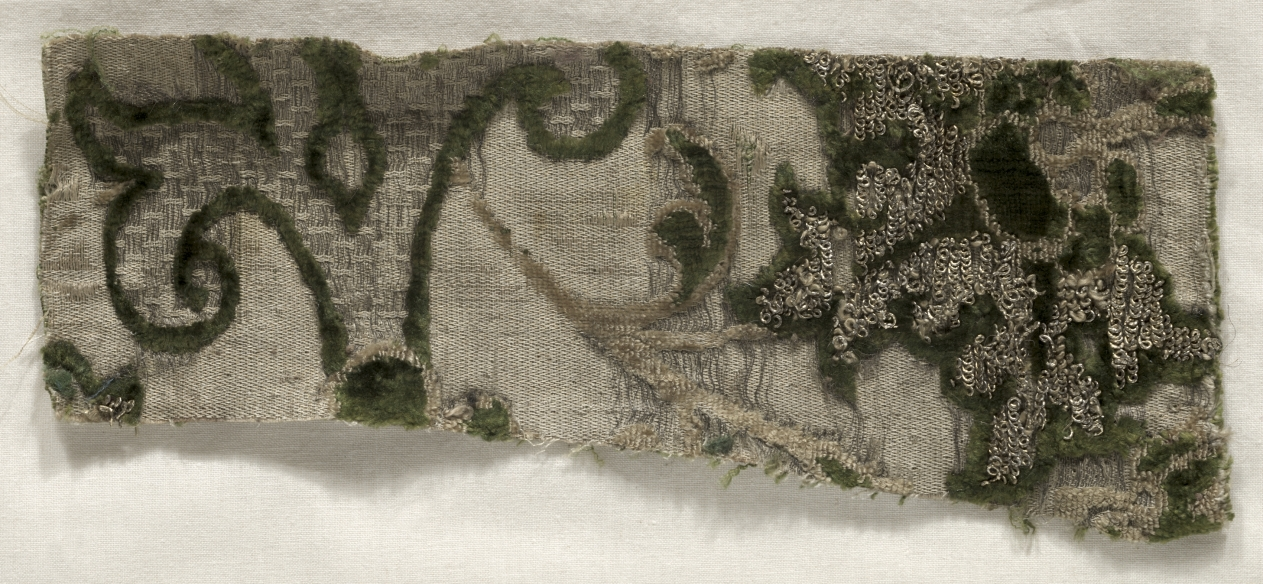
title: Cloth of Gold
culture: Spain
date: 1500s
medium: silk velvet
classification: Velvet